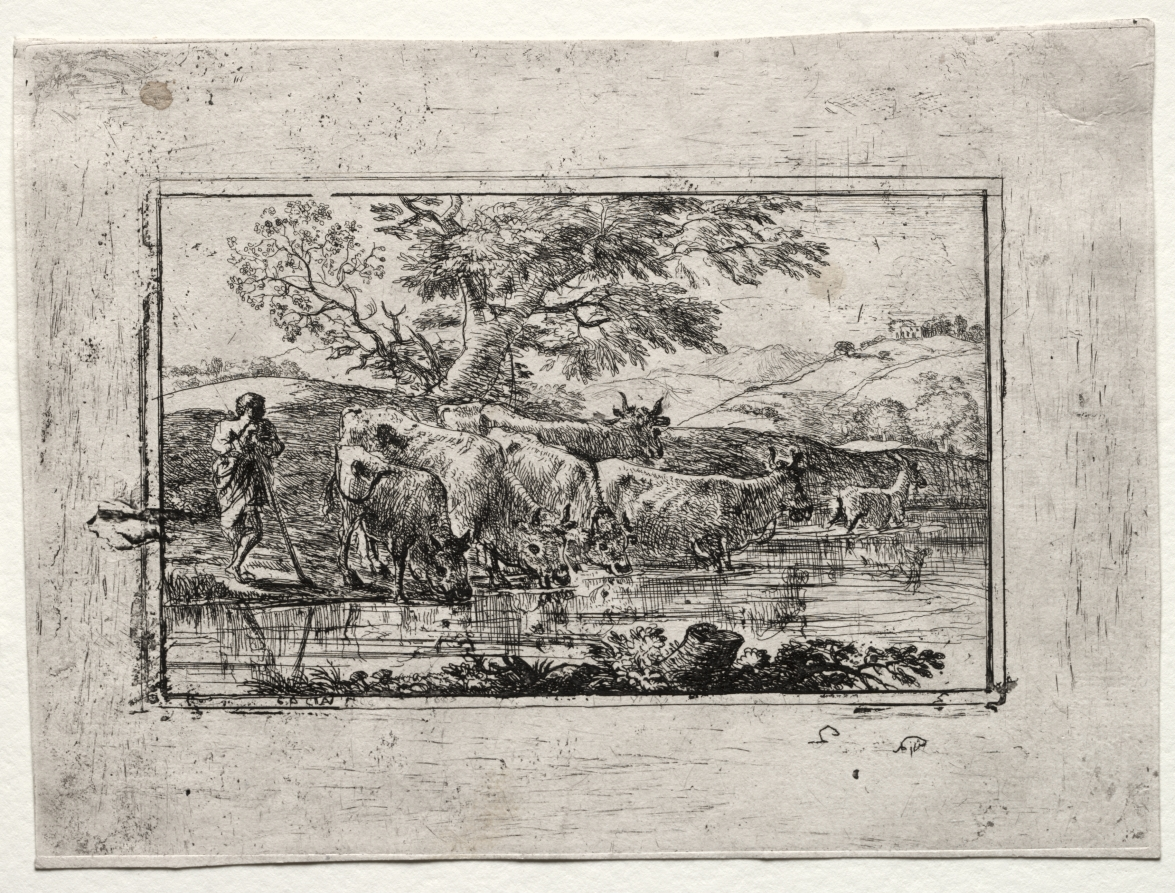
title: The Herd at the Watering Place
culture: France, 17th century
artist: Claude Lorrain (French, 1604–1682)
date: 1635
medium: etching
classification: Print